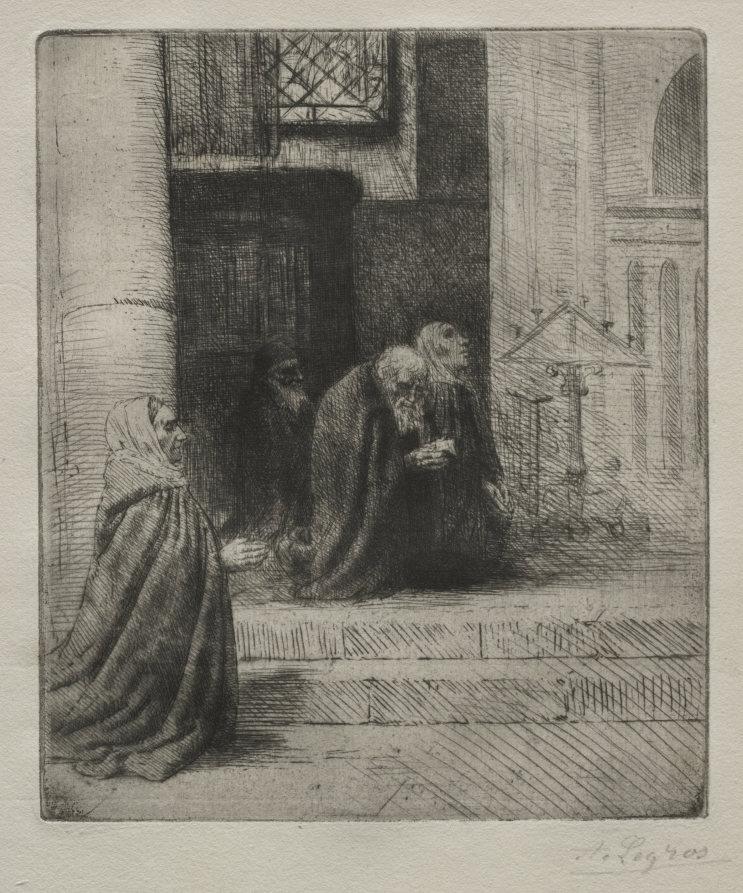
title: Interior of a Church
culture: France, 19th century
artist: Alphonse Legros (French, 1837–1911)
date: c. 1857–1911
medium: etching and aquatint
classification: Print